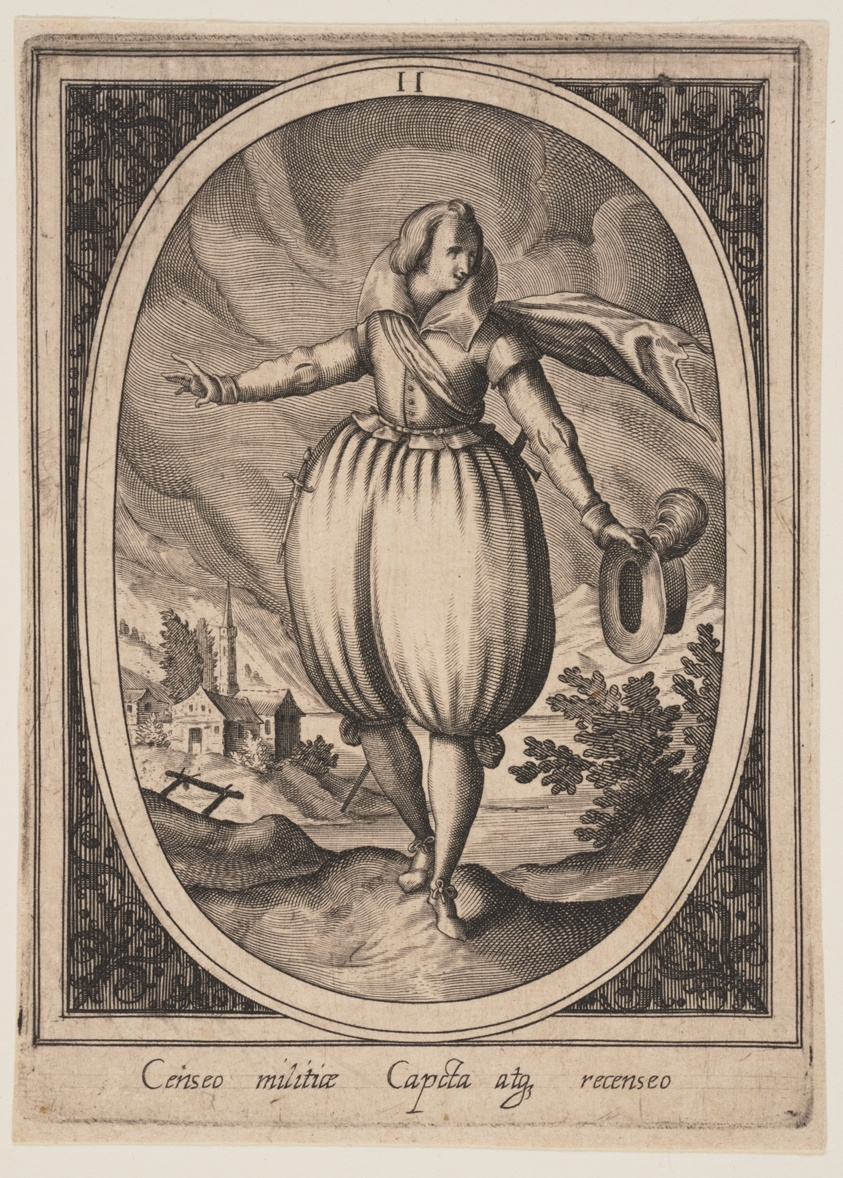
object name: Print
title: Plate 11 from Military Figures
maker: Attriuted to Heinrich Ulrich (German, c. 1572-1621); possibly after Paul Mair (German, active c. 1600)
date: c. 1590-1610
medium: Engraving on ivory laid paper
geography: Germany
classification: engraving; paper; print; prints and drawing